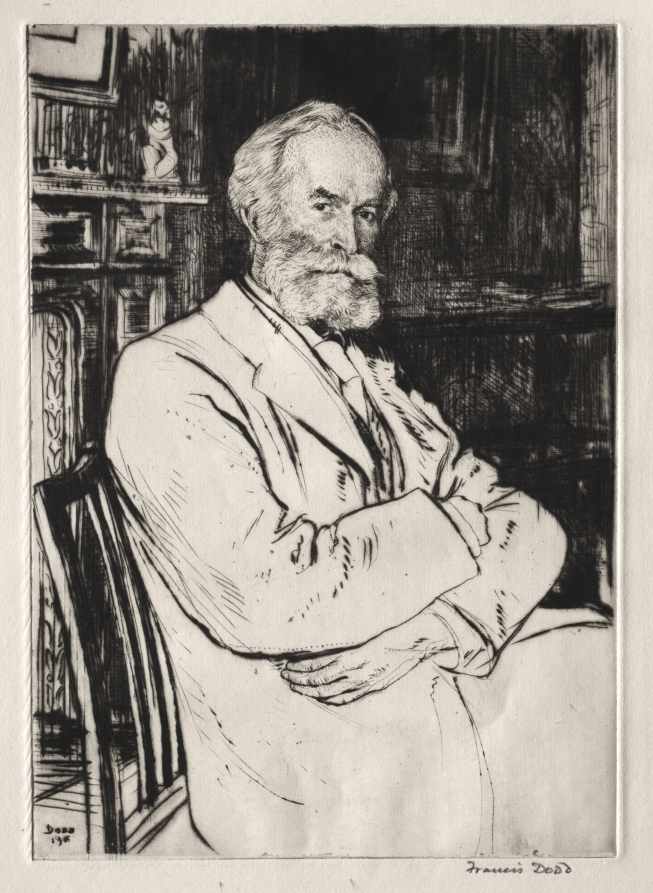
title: Charles Paley Scott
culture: England, 20th century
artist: Francis Dodd (British, 1874–1949)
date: 1916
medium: drypoint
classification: Print